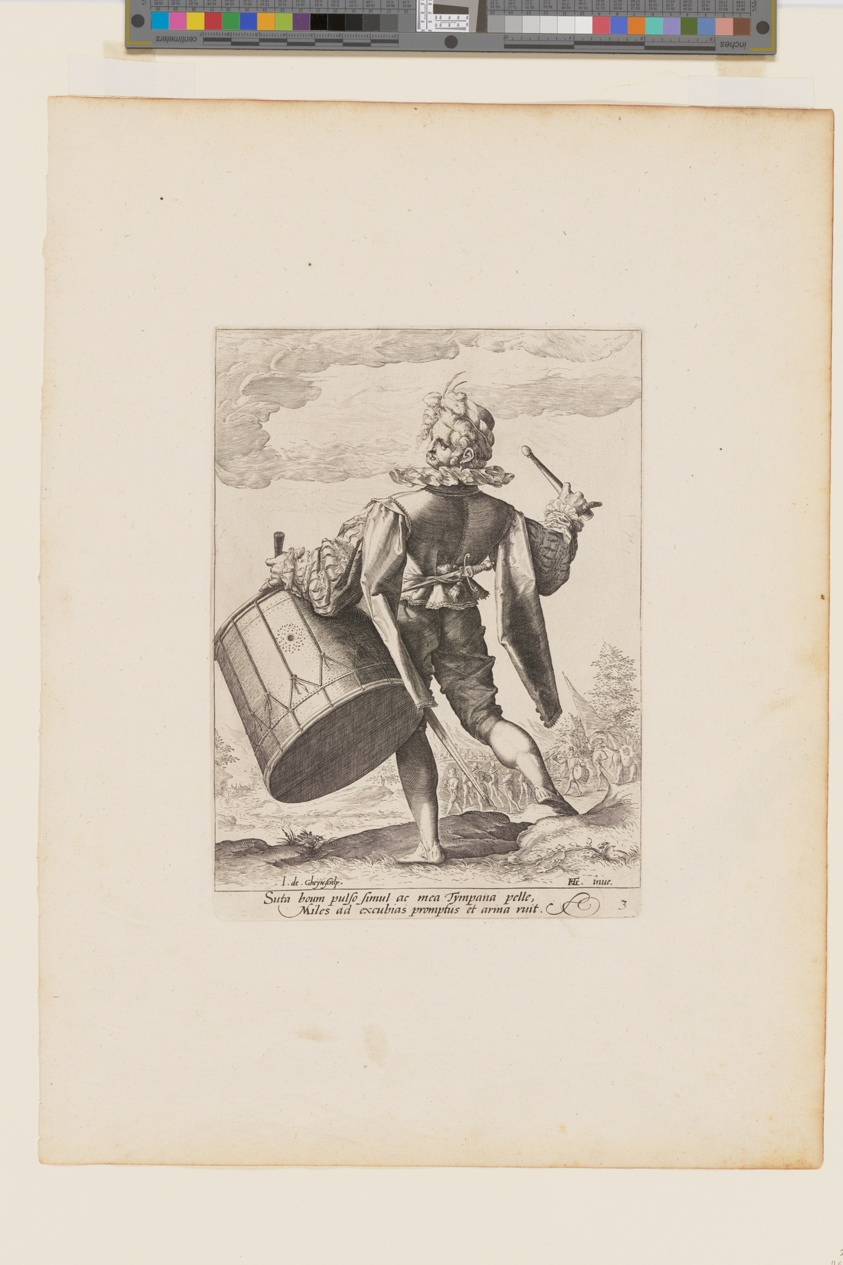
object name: Print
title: Drummer, from Officers and Soldiers of the Bodyguard of Emperor Rudolph II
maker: Jacques de Gheyn II (Dutch, 1565–1629); after Hendrick Goltzius (Dutch, 1558–1617)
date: 1587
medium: Engraving on ivory laid paper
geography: Netherlands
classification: engraving; paper; print; prints and drawing